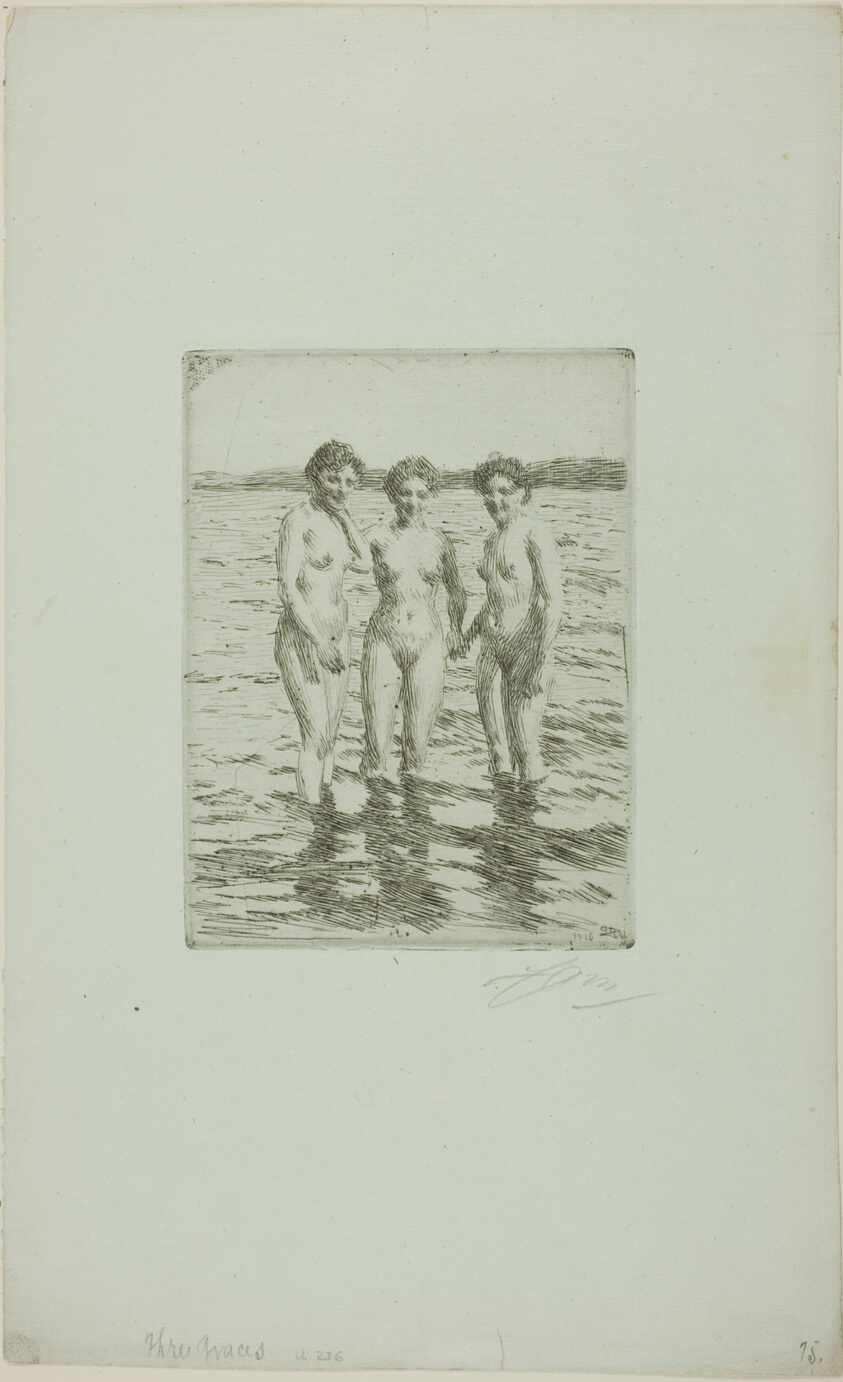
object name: Print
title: The Three Graces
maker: Anders Zorn (Swedish, 1860-1920)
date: 1910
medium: Etching on light blue laid paper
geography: Sweden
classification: etching; print; prints and drawing